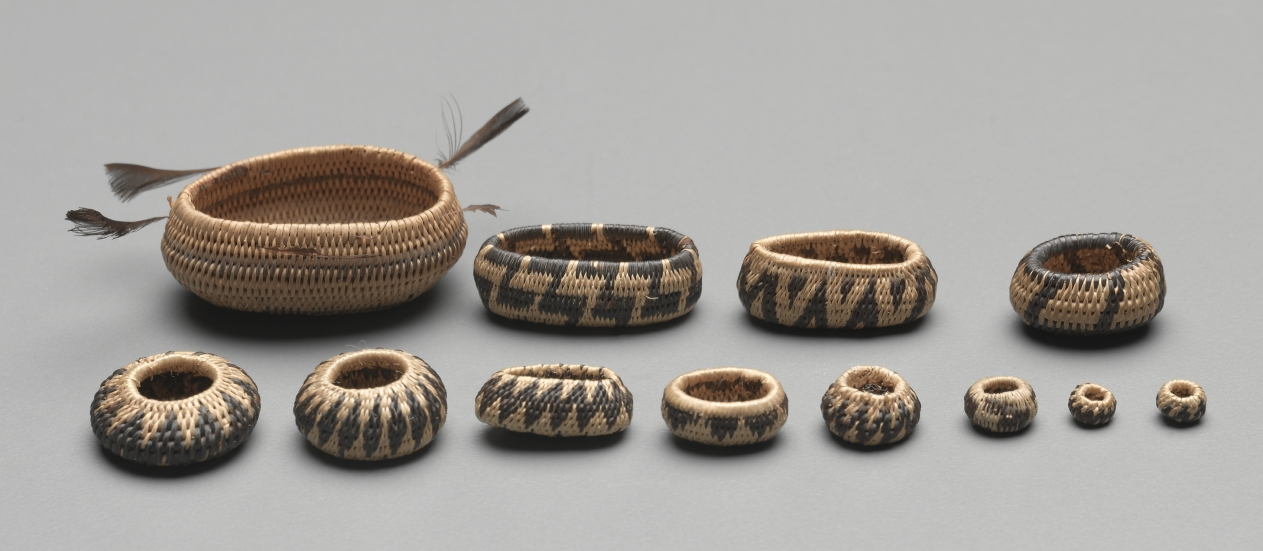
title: Miniature Oval Basket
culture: California, Pomo, 20th century (?)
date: Early 1900s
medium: coiled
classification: Basketry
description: Miniature baskets were made to demonstrate the basket-maker’s virtuoso skill, and these tiny marvels seem to be no exception—the smallest are just a few millimeters wide but still patterned. For such fine work, dexterity was required as much for preparation of materials as for weaving.